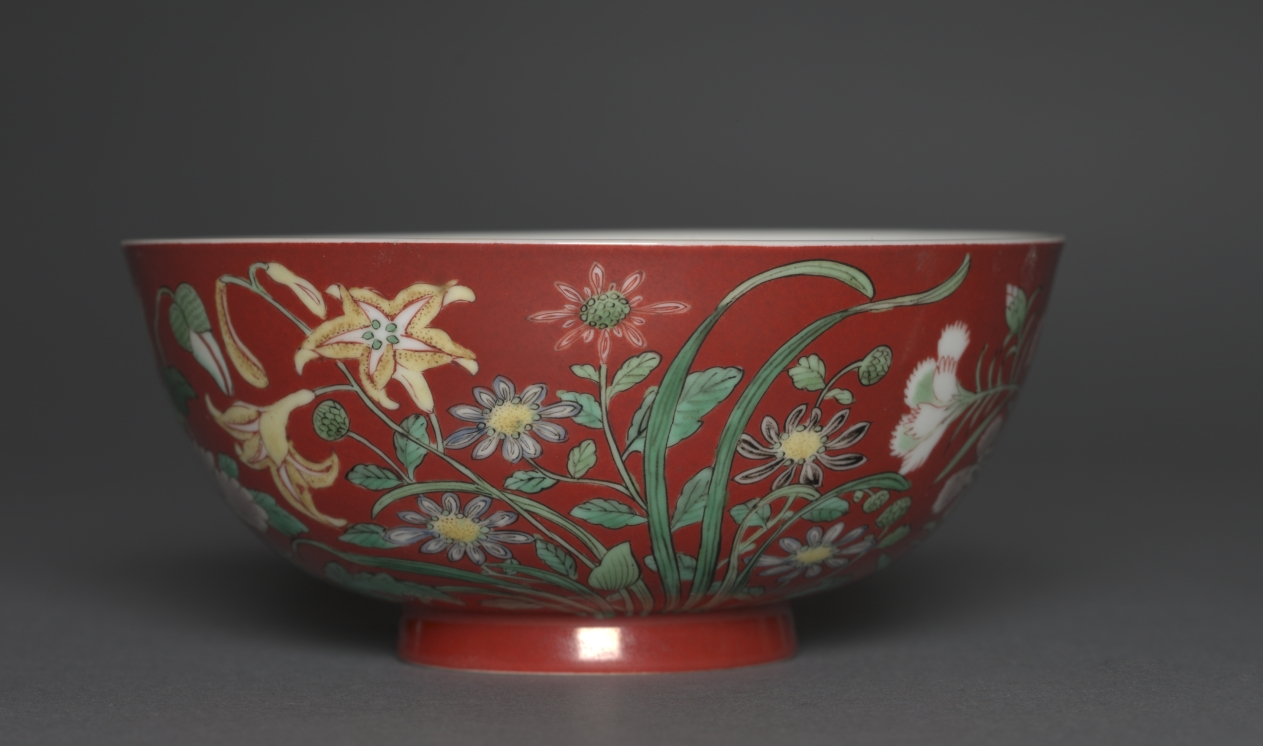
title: Bowl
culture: China, Jiangxi province, Jingdezhen kilns, Qing dynasty (1644-1911), Yongzheng mark and reign (1723-35)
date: 1723–35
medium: porcelain with overglaze enamel decoration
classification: Ceramic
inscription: 雍正御製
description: Flowers in vivid colors including peonies, lilies, and chrysanthemums are set against a brilliant red enamel ground. The petals and veins of leaves are depicted in fine outlines and soft colors demonstrating the craftsman’s excellent painting skill. This porcelain exemplifies the technical perfection of Qing dynasty court artisans who surpassed their predecessors in technical skill. The bowl bears a mark on its base reading “Made for Emperor Yongzheng 雍正御製.” The Yongzheng emperor was one of the three early Qing emperors whose taste greatly influenced art production and collecting.